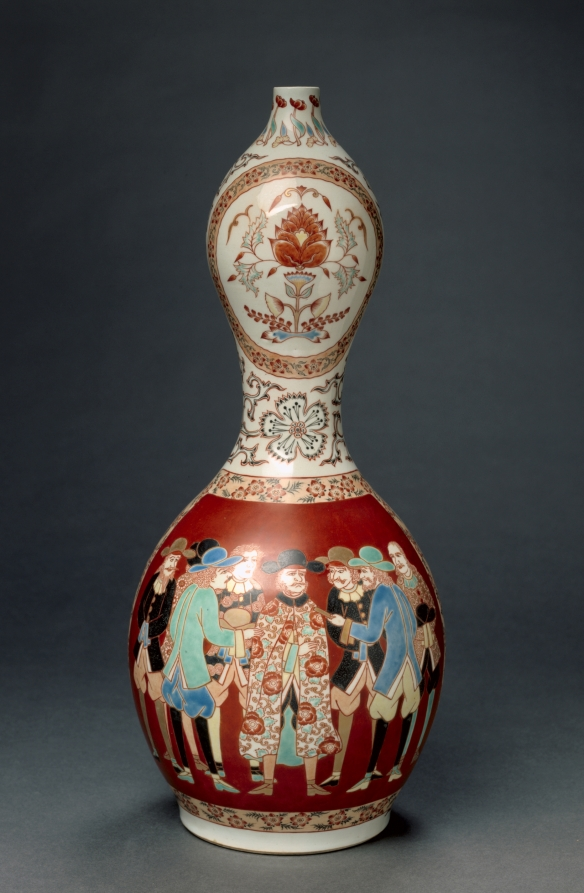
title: Bottle with Western Ships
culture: Japan, Edo period (1615–1868)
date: c. 1800–1868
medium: Porcelain with decoration in colored enamels and underglaze blue, overglaze enamels, and gold (Hizen ware, Arita type)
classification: Ceramic